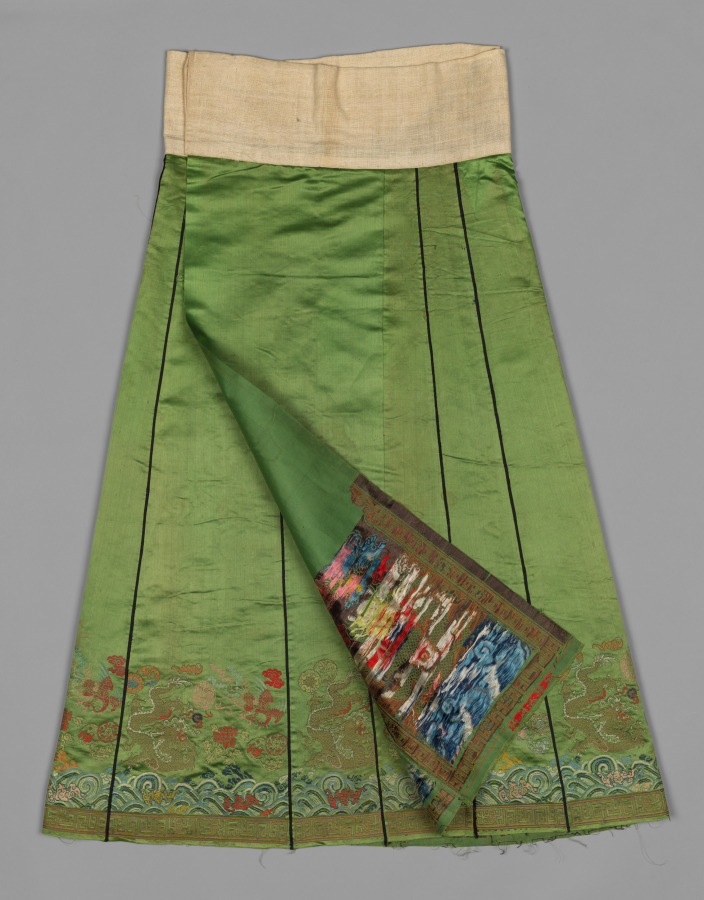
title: Skirt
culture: China, Qing dynasty (1644-1911)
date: late 1800s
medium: Silk and gold thread: embroidery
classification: Garment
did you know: This is a bridal skirt that would be worn with a coat like CMA 1916.1355.